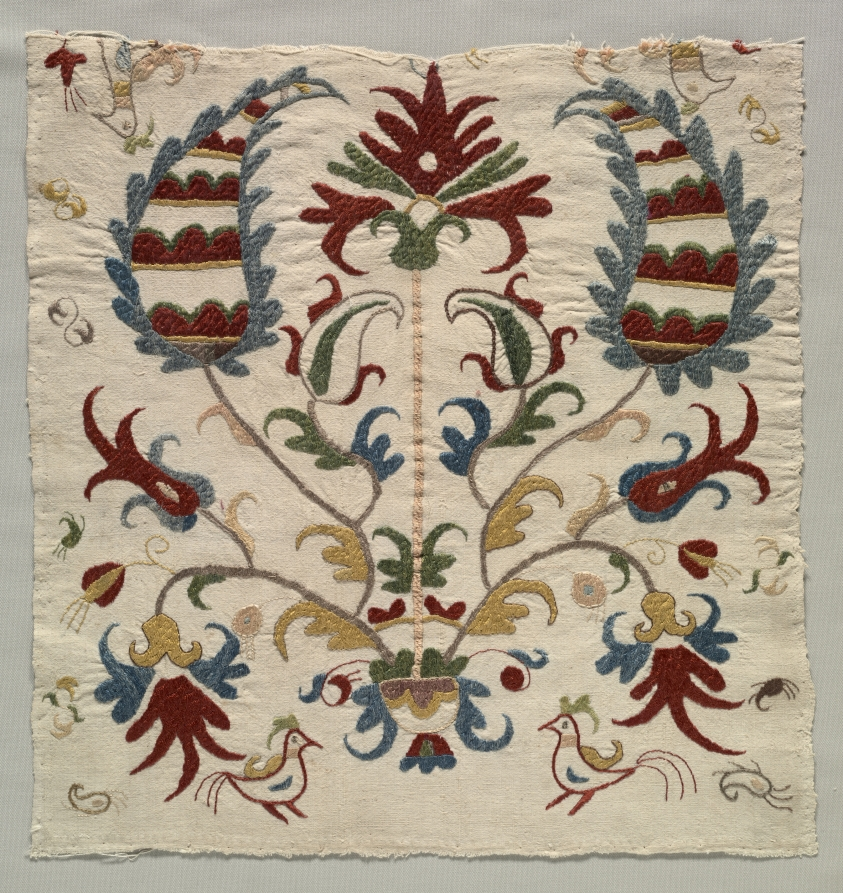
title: Fragment of Pillow Cover or Panel of Bedspread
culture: Greece, Sporades Islands, Skyros, 19th century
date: 1800s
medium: embroidery: silk on linen tabby ground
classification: Embroidery